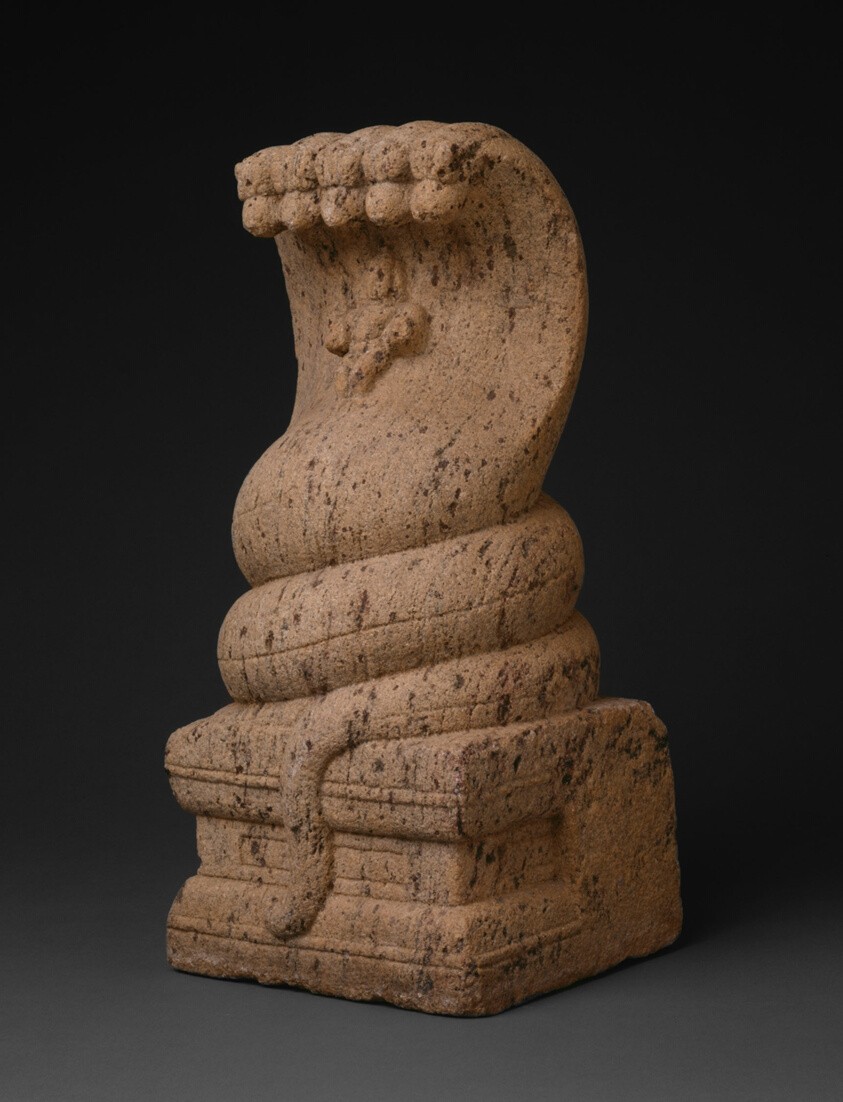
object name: Sculpture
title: Child Krishna Protected by a Serpent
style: South Asian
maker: India; Tamil Nadu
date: c. 15th century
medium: Granite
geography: Tamil Nadu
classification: stone; sculpture; asian art